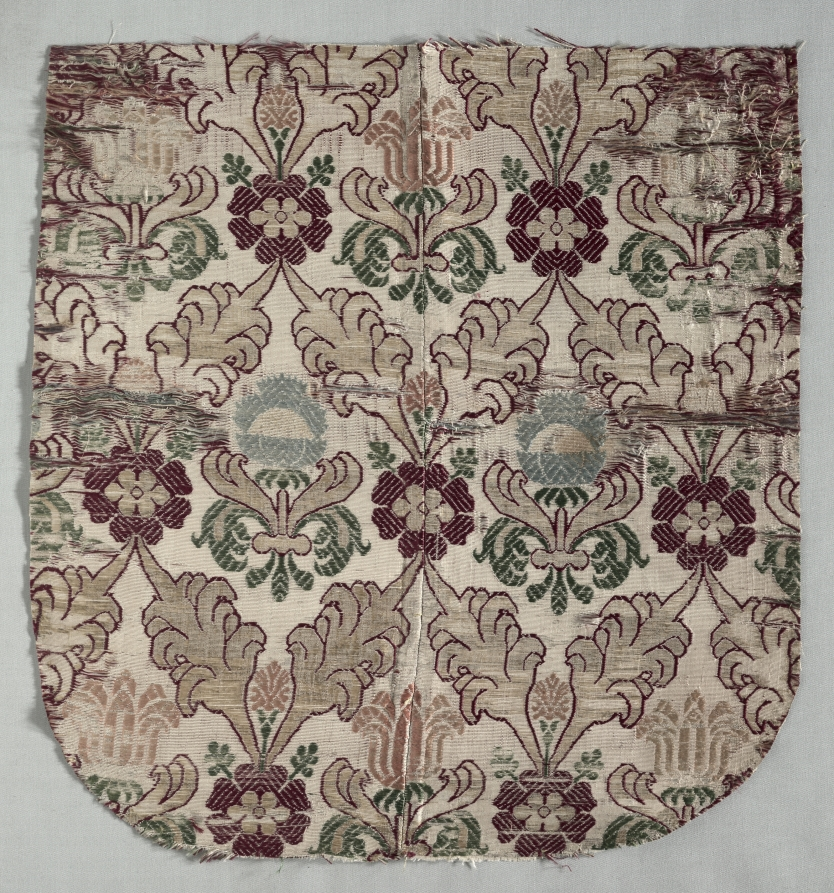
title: Hood of a Cape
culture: Italy, 16th century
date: 1500s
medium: brocade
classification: Textile